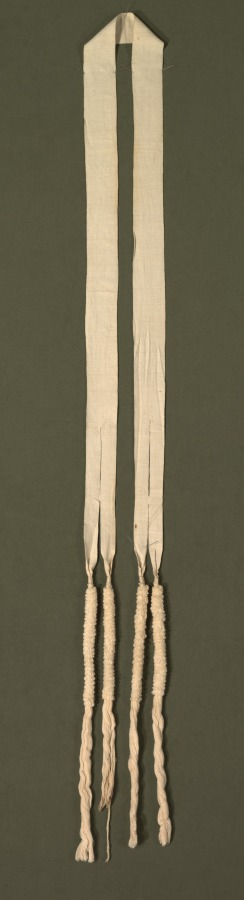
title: Band with Tassels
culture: Peru, North Coast, Chimú style, 1200-1460s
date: 1455–1625 (radiocarbon date, 95% probability)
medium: cotton; weft-faced plain weave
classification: Garment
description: This garment may have been found with others in the collection that formed a matched set worn by a noble of the Chimú, who rose to power on Peru’s north coast after the year 1000.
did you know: The Chimú forged an empire that thrived until the 1460s, when the Inka incorporated it into their own imperial domain.